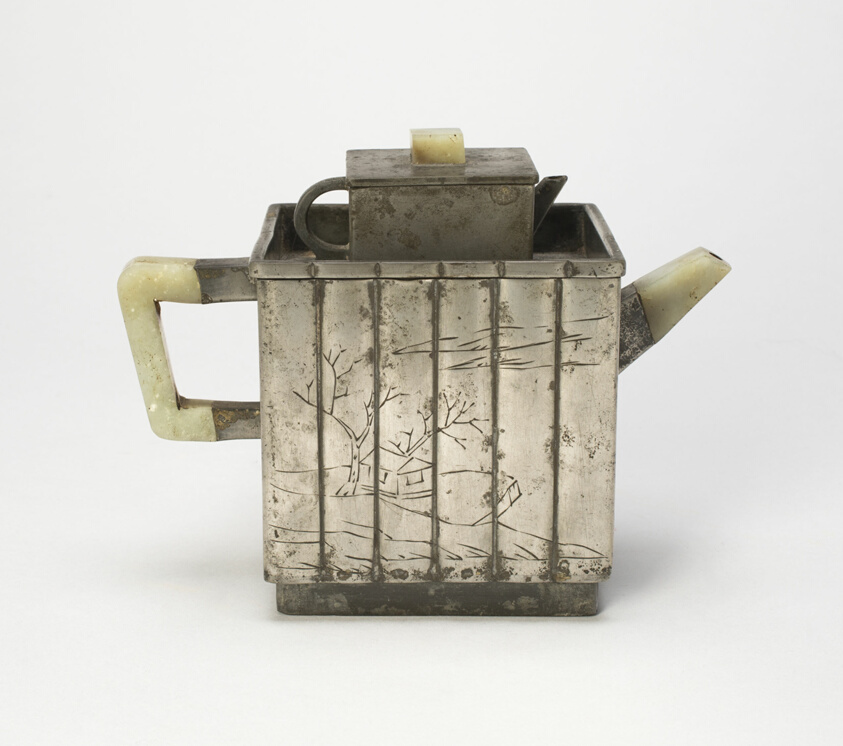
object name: Vessel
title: Heater for Rice Wine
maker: China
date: Ming dynasty (1368–1644)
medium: Pewter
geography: China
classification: pewter; metalwork; asian art